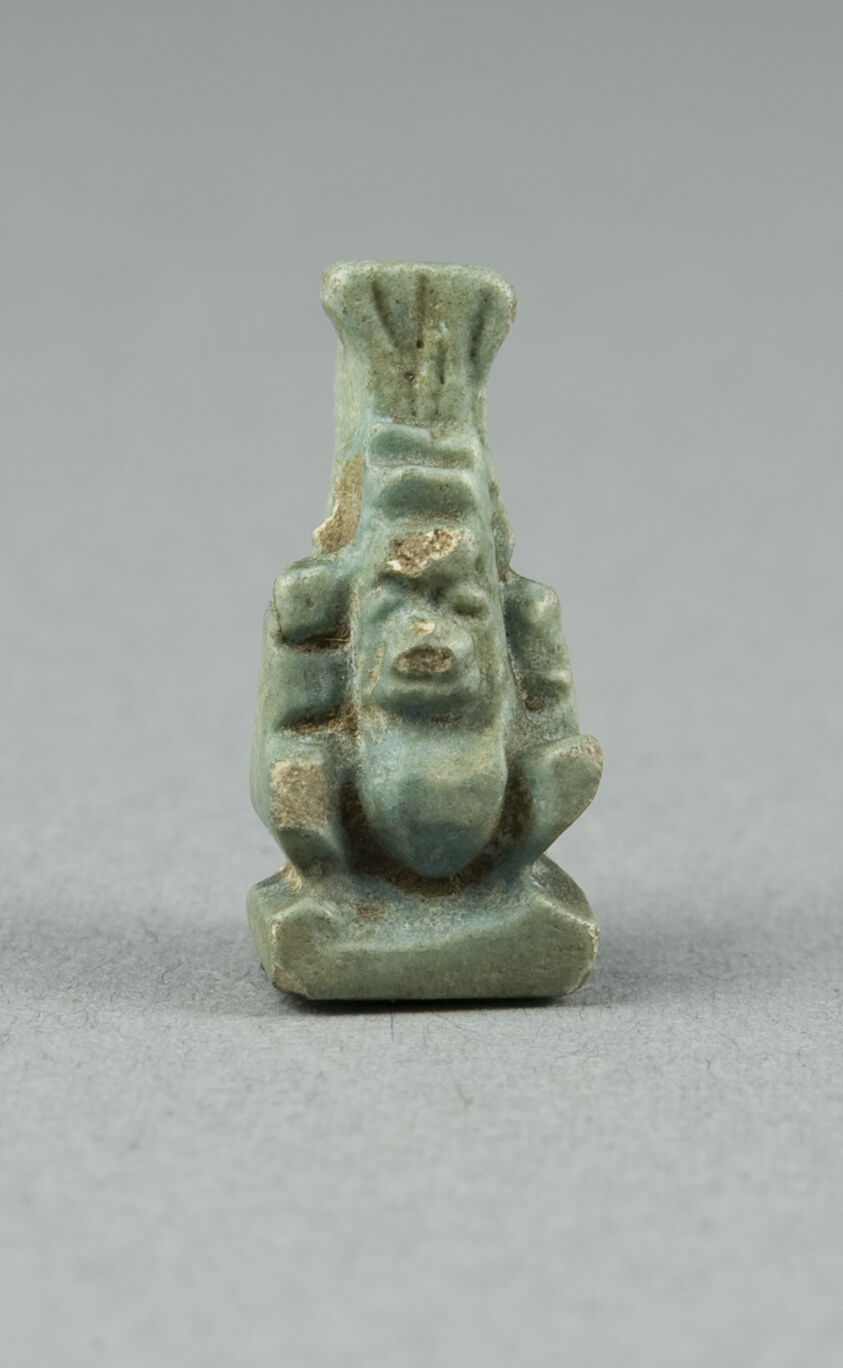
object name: Costume and Accessories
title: Amulet of the God Bes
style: egyptian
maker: Egyptian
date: Third Intermediate Period, Dynasty 21–25 (about 1069–664 BCE)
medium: Faience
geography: Egypt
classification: amulet; jewelry; ceramics; ancient art; costume; faïence (composite material)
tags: gods (deities)